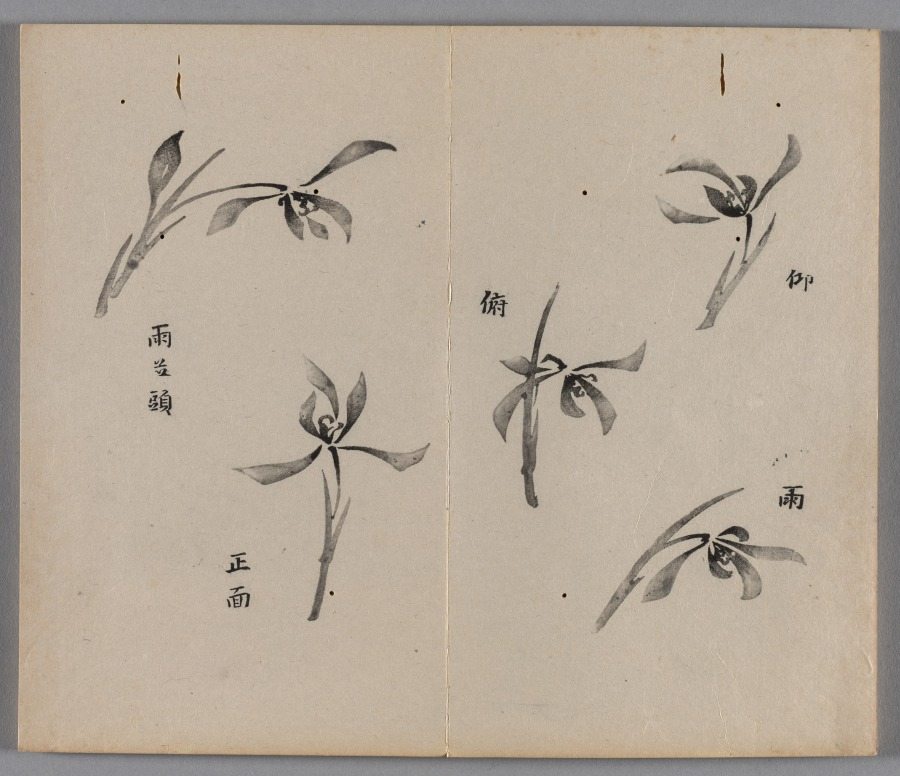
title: Ten Bamboo Studio Painting and Calligraphy Handbook (Shizhuzhai shuhua pu): Orchids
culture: China, Qing dynasty (1644-1911)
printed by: Hu Zhengyan (Chinese, c. 1584–1674)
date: 1633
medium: Woodblock-printed book; ink and colors on paper; first edition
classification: Print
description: Color printing reached a level of perfection in the early 1600s, as seen in this Ten Bamboo Studio Collection of Calligraphy and Painting and the Mustard Seed Garden Manual of Painting (printed 1679 and 1701). The painterly quality, precision in registering (aligning) the woodblocks, and harmonious colors made them the most successful color print editions in Chinese history. Both editions were printed and compiled in Nanjing, spread nationwide, and had a great impact on the arts in Japan and Korea.